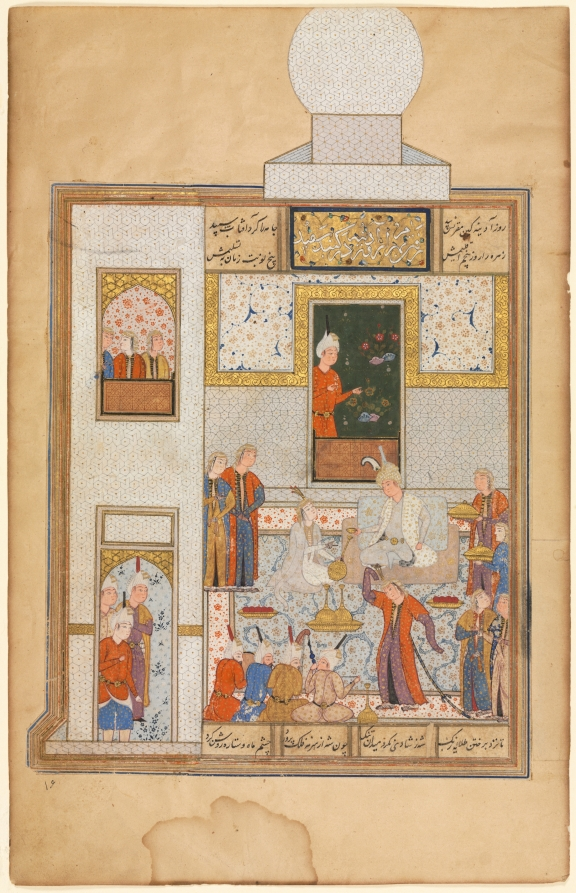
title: Bahram Visits the White Domed Pavilion on Friday (recto)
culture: Iran, Shiraz, Safavid period (1501-1722)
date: c. 1560–80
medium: opaque watercolor, ink, and gold on paper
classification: Manuscript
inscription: Script: Nasta'liq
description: The Haft Paykar is an epic romantic poem that tells the story of the Sasanian king, Bahram Gur (ruled AD 420–38). The story relates how the king had an architect construct seven domed pavilions with different colors for each of his seven beautiful brides who came from different parts of the world. On each day of the week, the king visited one princess and enjoyed her company. In the center of this scene, sits Bahram and his bride from Iran dressed in resplendent white garments. Attendants bring them food and drink, while a dancer and an ensemble of musicians entertains them.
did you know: The wife recounts a tale with dancing fairies, suggested by the girl dancing to music in the foreground of the painting.